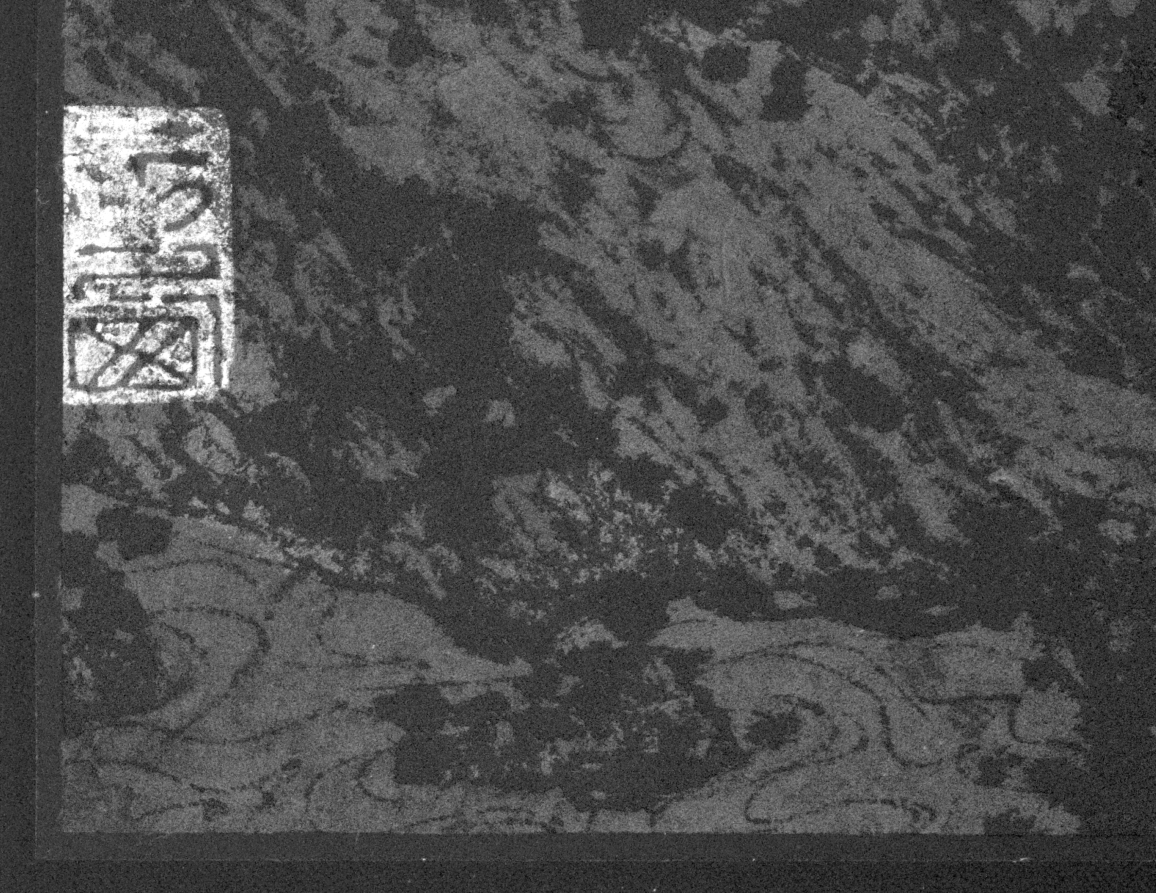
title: Writing Books under the Pine Trees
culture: China, Yuan dynasty (1271-1368)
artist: Wang Meng (Chinese, c. 1308–1385)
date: c. 1308–85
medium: Album leaf; ink and color on paper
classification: Painting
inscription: Artist's inscription, signature, and seal: Many years and months passed by the locked gate/ Behind which the scholar has been immersed in writing his books;/ While the pine trees he had planted/ Have all grown up with old dragon scales./ The Yellow Crane Mountain Woodcutter [Huang-ho-shan-ch'iao] painted this for Chen-su [the hao of Ts'ao Chih-po]. [seal] Wang Meng yin.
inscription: 2 additional seals: 1 of Ts'ao Chih-po (1271–1355); 1 unidentified.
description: Wang Meng, born into a distinguished family in Wuxing (modern Huzhou), Zhejiang province, was the maternal grandson of Zhao Mengfu (1254–1322). Aside from intermittent political commitments under the foreign Mongol and Ming governments, Wang dedicated most of his life to retirement, as conveyed in this painting. By the 1360s, when the Red Turbans began to rebel against the Yuan dynasty leaders, and the Mongols gradually lost control over Jiangnan, Wang Meng withdrew into the mountains north of Hangzhou, calling himself Woodcutter of Yellow Crane Mountain. In the early years of the Ming dynasty, Wang was caught up in a purge and died in prison.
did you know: Wang Meng wrote the inscription at the right in classical seal script and applied his signature and seal on the left side of the composition.